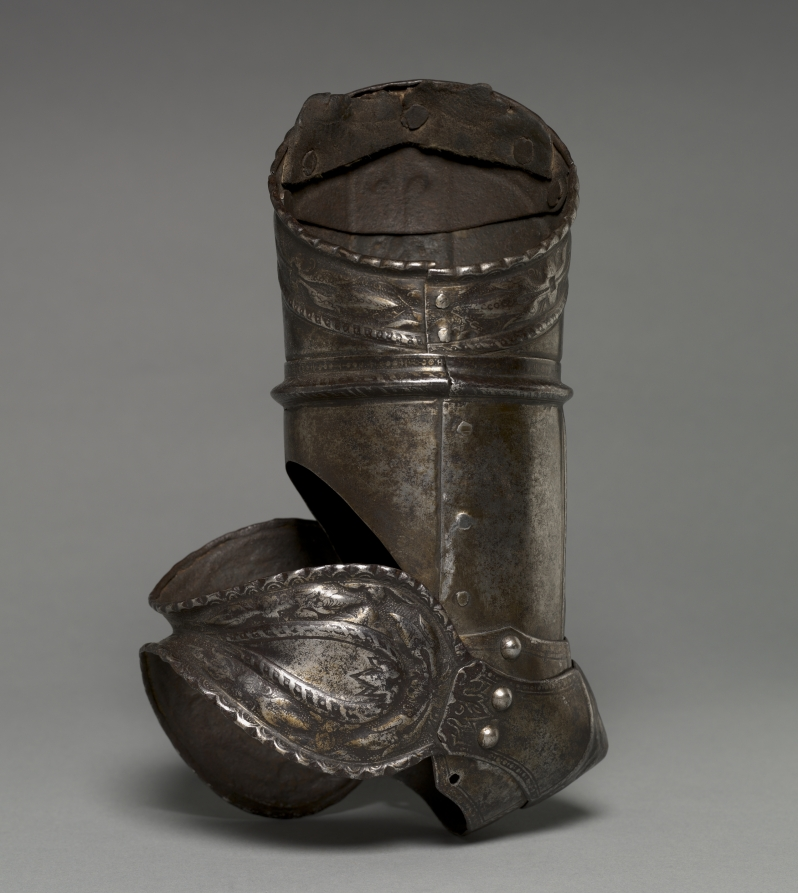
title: Right Arm Elements from a Boy's Armor (Rerebrace with Couter)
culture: Germany, Augsburg, mostly 16th Century (some modern)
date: c. 1560 (some modern)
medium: etched and lightly embossed steel with traces of gilding, leather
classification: Arms and Armor